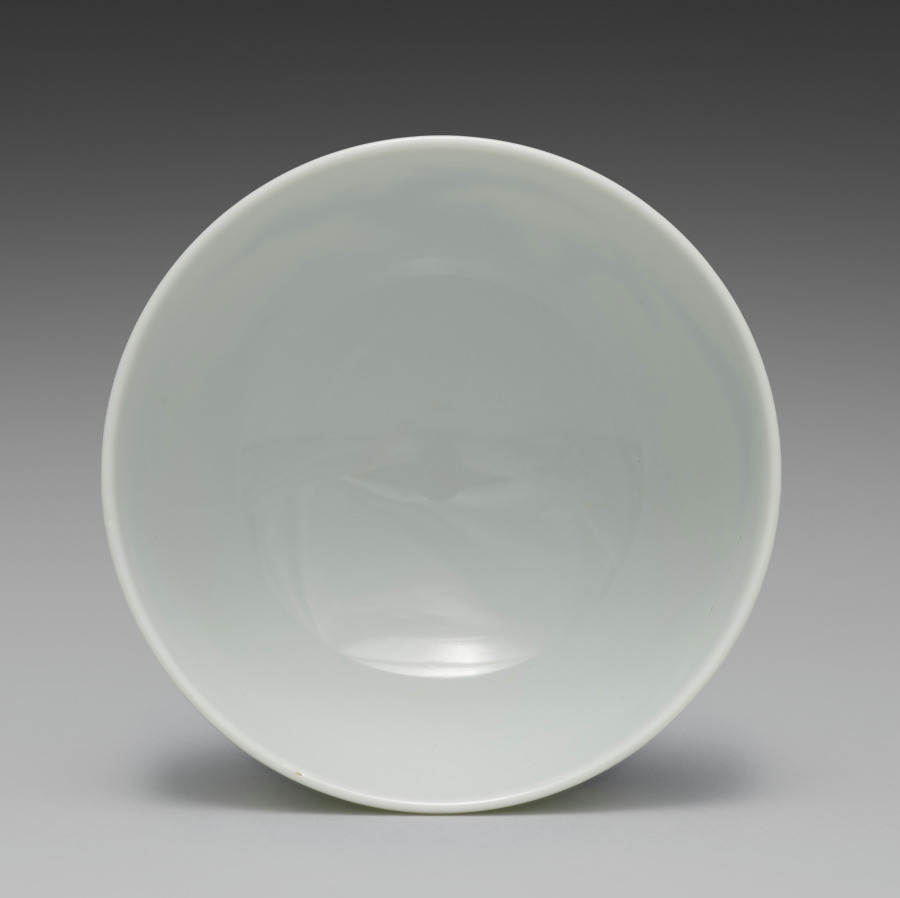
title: Teacup from Tea Set with Chinese Landscape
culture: Japan, Meiji period (1868–1912)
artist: Seifū Yohei III (Japanese, 1851–1914)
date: 1893–1914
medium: Porcelain with underglaze blue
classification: Ceramic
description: The theme of this sencha tea set is the Chinese scholar-recluse in an idyllic landscape. Each of the five teacups has a landscape with an architectural structure and some human activity. This tea set has a side-handled pot called a kyūsu, used for steeping, straining, and serving tea. Unlike some others, this set also has a yuzamashi, a container used to cool boiled water to just the right temperature for the best flavor when steeping. Seifū Yohei III’s painting teacher, Tanomura Chokunyū (1814–1907), made a visual record of famous sencha events that shows how these kinds of porcelains fit with objects such as a stove and kettle to form a complete set of utensils for tea preparation, and with ensembles of decorative objects meant to inspire creativity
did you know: This cup has a man walking toward a group of three pavilions announced with a banner hanging from a tall post; beyond this are two large deciduous trees sheltering a stand of small conifers. Across the water from this site is another man sitting on the bank fishing with a large woven basket for his catch beside him.